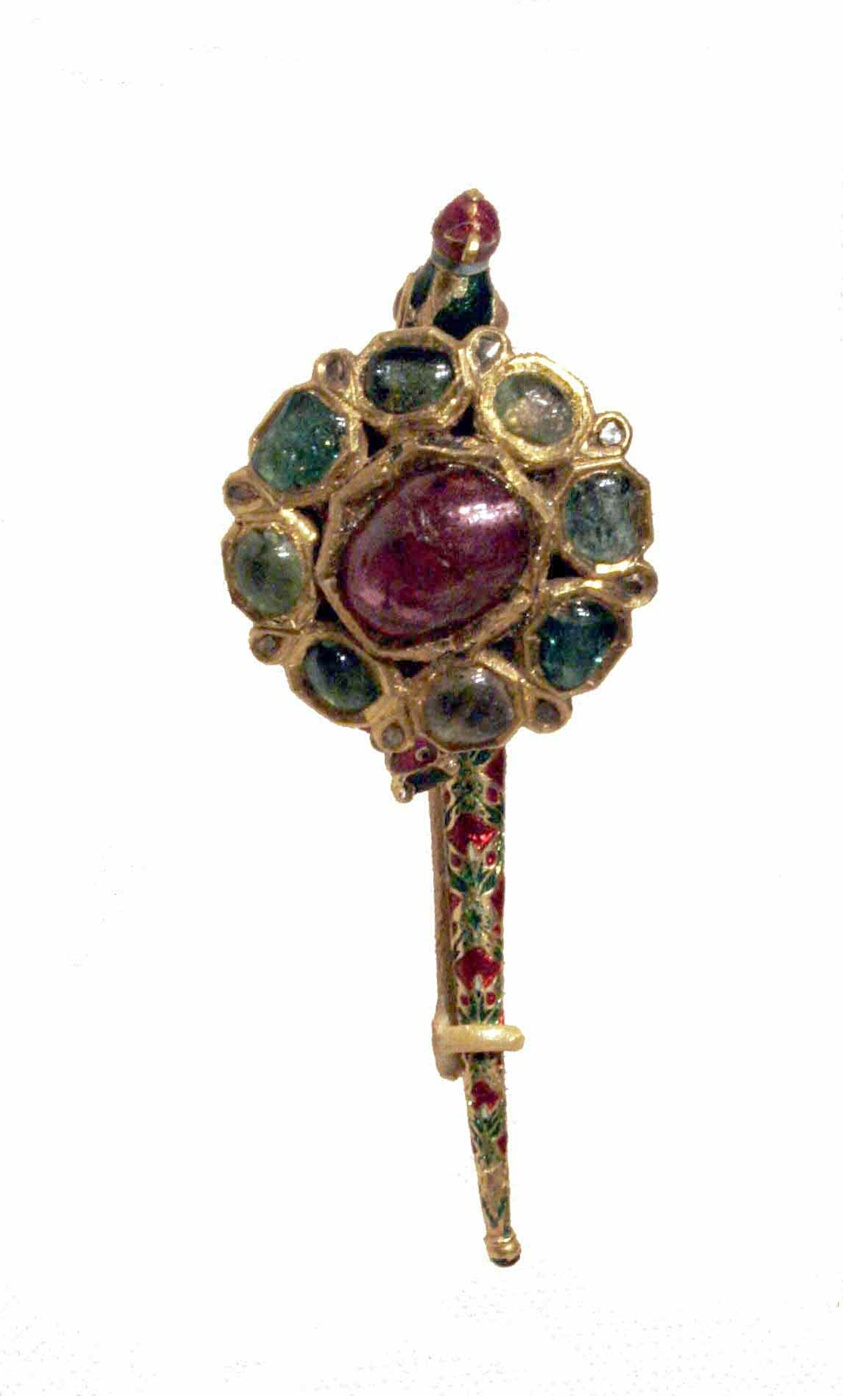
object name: Costume and Accessories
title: Turban Ornament (Turra)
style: South Asian, mughal, Indian (South Asian), asian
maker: India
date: 18th/19th century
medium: Gold, ruby, emeralds, and diamonds inset in the kundan technique, with polychrome enamel (minakari)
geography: India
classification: gold; metal; jewelry; asian art; costume